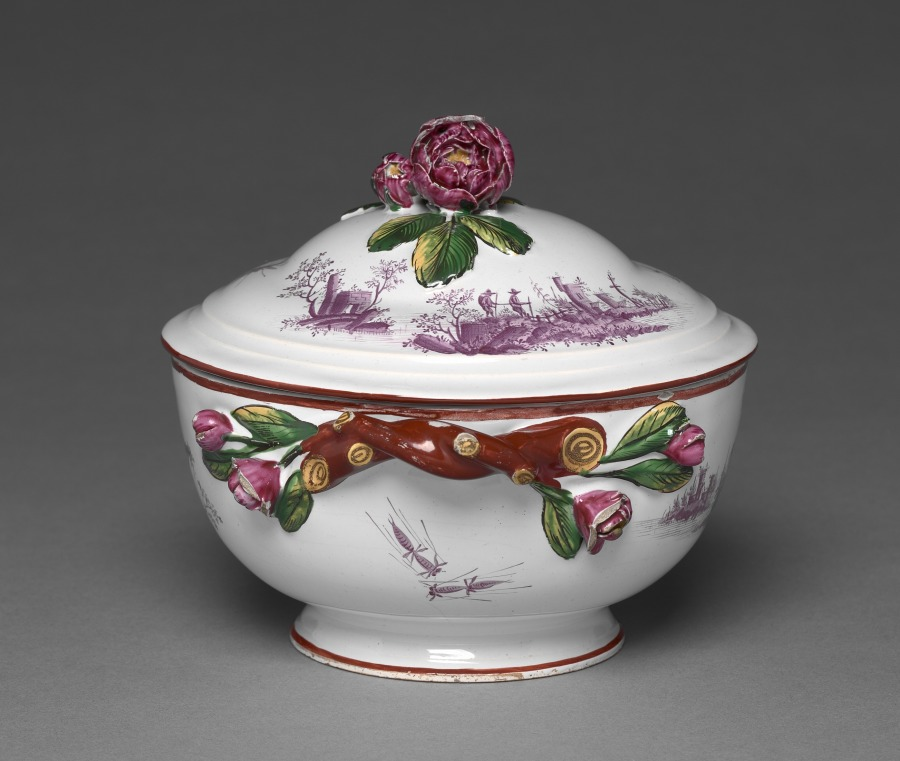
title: Covered Bowl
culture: France, 18th century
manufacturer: Saint-Clément Factory (French)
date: c. 1775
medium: tin-glazed earthenware (faience) with enamel decoration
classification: Ceramic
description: The faience factory at Saint-Clément in eastern France closely imitated the styles and techniques employed by the Hannong's at Strasbourg. The monochrome landscapes in red on this covered bowl demonstrate the influence of German, in this case Meissen, porcelain on the faience made in this part of France.